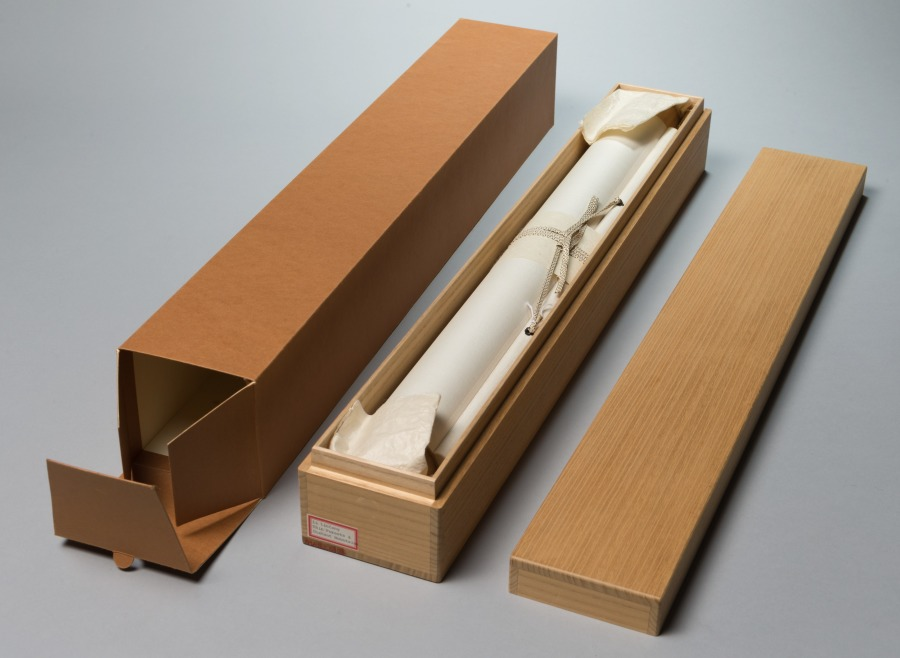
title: Thin Forest and Distant Mountains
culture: China, Ming dynasty (1368–1644)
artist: Li Liufang (Chinese, 1575–1629)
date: 1628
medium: hanging scroll, ink on paper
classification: Painting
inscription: Artist's inscription, signature, and 2 seals: Thin forest and distant mountains have always attracted me; As if they were from the brush and ink of Ni Tsan, left behind by the master in this mortal world. Now that the quiet recluse has chosen to live in the South of the City. He paints the spring breeze---over a curve of the river. In the spring day of the wu-ch'en year [1628] I made this painting and attached an old poem. Li Liu-fang [seals] Li Liu-fang-yin; Chang-heng shih. trans. WKH 1 additional seal of Chung Wen-ming (17th c.).